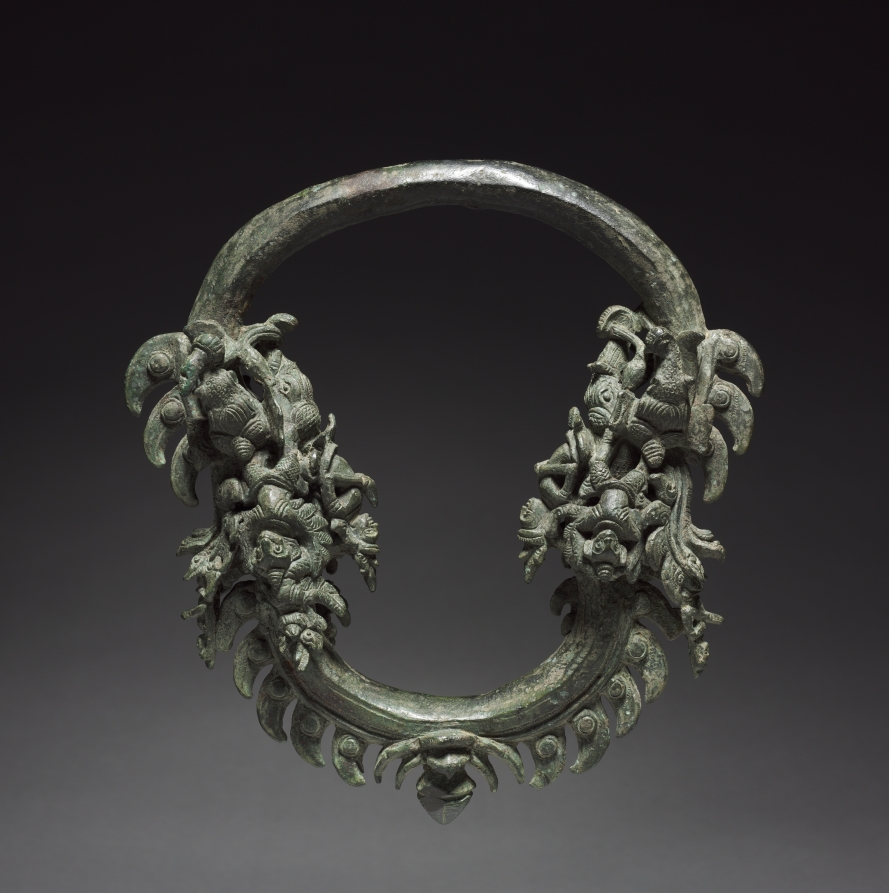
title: Palanquin Ring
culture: Cambodia, probably Angkor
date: 1100s–1200s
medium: bronze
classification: Sculpture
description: When members of the royal family or priesthood traveled in a public festival procession to make offerings at a temple or participate in a ceremony, they would be carried in a palanquin, or a covered litter. Portable objects of veneration, such as bronze images or a sacred fire, were also carried on palanquins. The palanquins had wooden poles, hanging seats or raised platforms, and bronze fittings cast in intricate forms and gilt, lending the palanquins a sumptuous quality. This ring, which supported a suspended seat, would have hung on a hook attached to a wooden pole. The body of the ring is shaped in the form of a pair of nagas, or serpents. The flanges, or protrusions, on the top and sides are stylized spines of the serpent’s body, and the heads rear up on either side. In a richly textured cluster of separately cast figures on both sides of the ring are images of composite bird-human, monkey-human, and elephant forms.